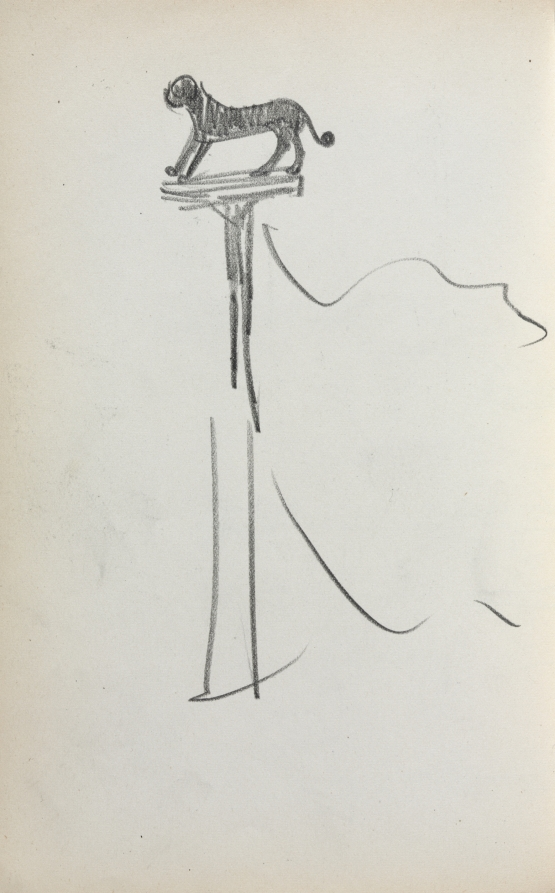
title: Italian Sketchbook: San Marco Lion (?) (page 39)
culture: America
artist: Maurice Prendergast (American, born Newfoundland [now Canada], 1858–1924)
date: 1898–1899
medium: pencil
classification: Bound Volume